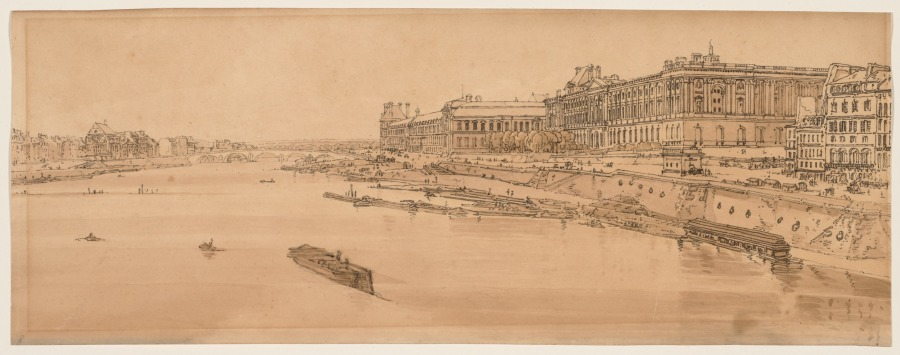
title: A Selection of Twenty of the Most Picturesque Views in Paris: View of the Louvre and Bridge of the Tuilleries taken from Pont Neuf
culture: England, early 19th Century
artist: Thomas Girtin (British, 1775–1802)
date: 1802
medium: soft-ground etching with bistre wash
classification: Print